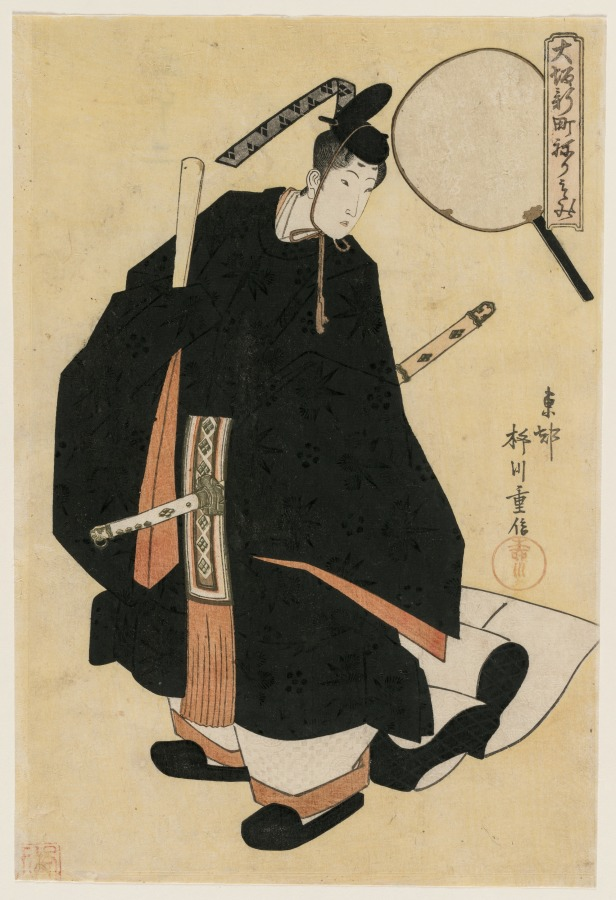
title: The Geisha Motozuru (?) of Kaideya as a Dancer in Court Robes (from the series The Parade in the Shimmachi District of Osaka)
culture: Japan, Edo period (1615–1868)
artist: Yanagawa Shigenobu (Japanese, 1787–1832)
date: early 1820s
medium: color woodblock print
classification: Print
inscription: Signature: Toto Yanagawa Shigenobu Artist Seal: Yanagawa